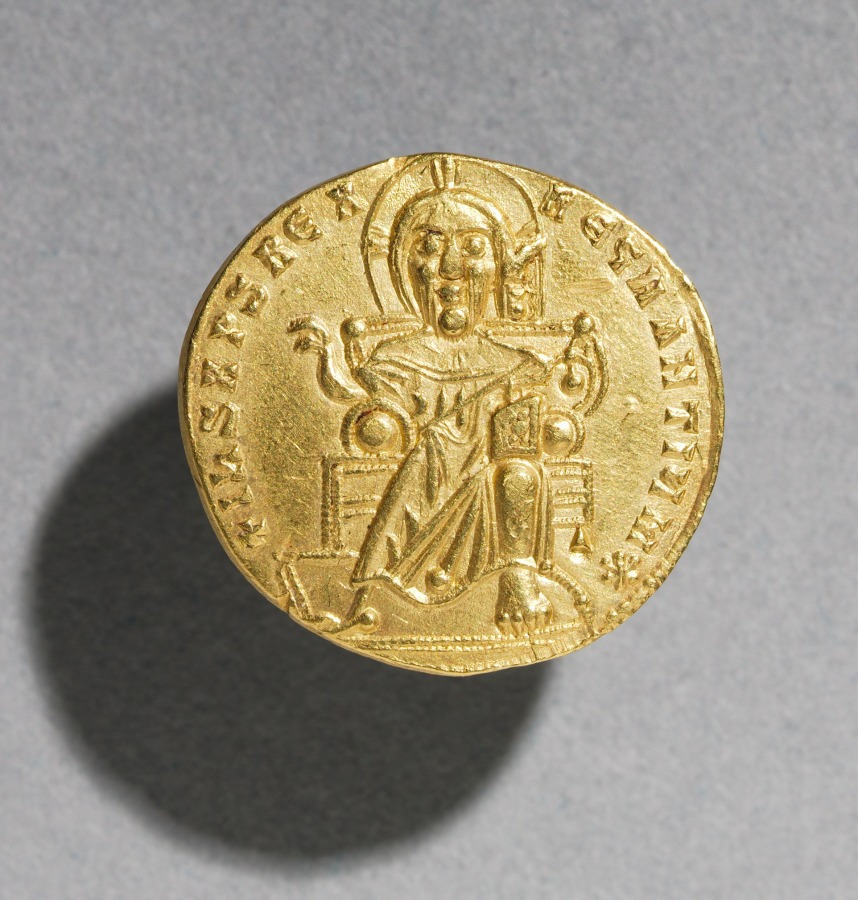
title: Solidus with Romanus I Lecapenus and His Son Christopher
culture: Byzantium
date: 920–944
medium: gold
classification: Coins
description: Byzantine Gold Coins The vast number of surviving Byzantine coins attests to the level of trade across the empire. Controlled and supervised by the emperor, the producers of coins took care to represent his authority and reflect his stature. Talented artists were recruited to engrave the dies (molds) used for the striking of coins. Emperors increasingly came to include their heirs and co-emperors on their coinage, as well as other family members or even earlier rulers. Coins were recognized, then as now, as small, portable works of art. With their inscriptions and images, Byzantine coins provide valuable documentation of historical events and a record of the physical appearance of the emperors. The coins shown here include the solidus, the basic gold coin of 24 karats; the tremissis, a gold coin of one-third the weight and value of the solidus; and the nomisma, which in the 10th century replaced the solidus as the standard gold coin.